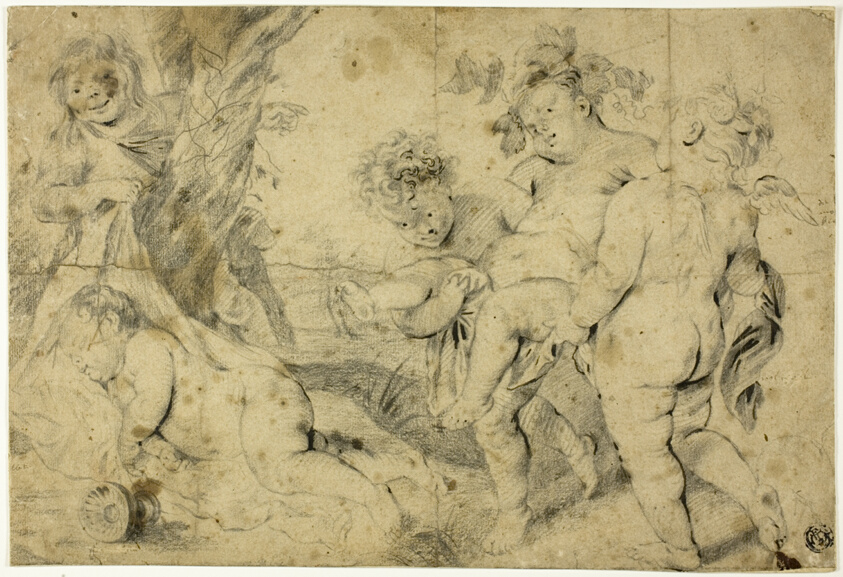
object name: Drawing and Watercolor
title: Young Bacchus and Companions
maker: After Anthony van Dyck (Flemish, 1599-1641); or Hans Jordaens, I (Dutch, c. 1572-1630); or the school of Peter Paul Rubens (Flemish, 1577-1640)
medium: Red chalk on ivory laid paper, laid down on board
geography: Flanders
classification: graphite; drawings (visual works); prints and drawing